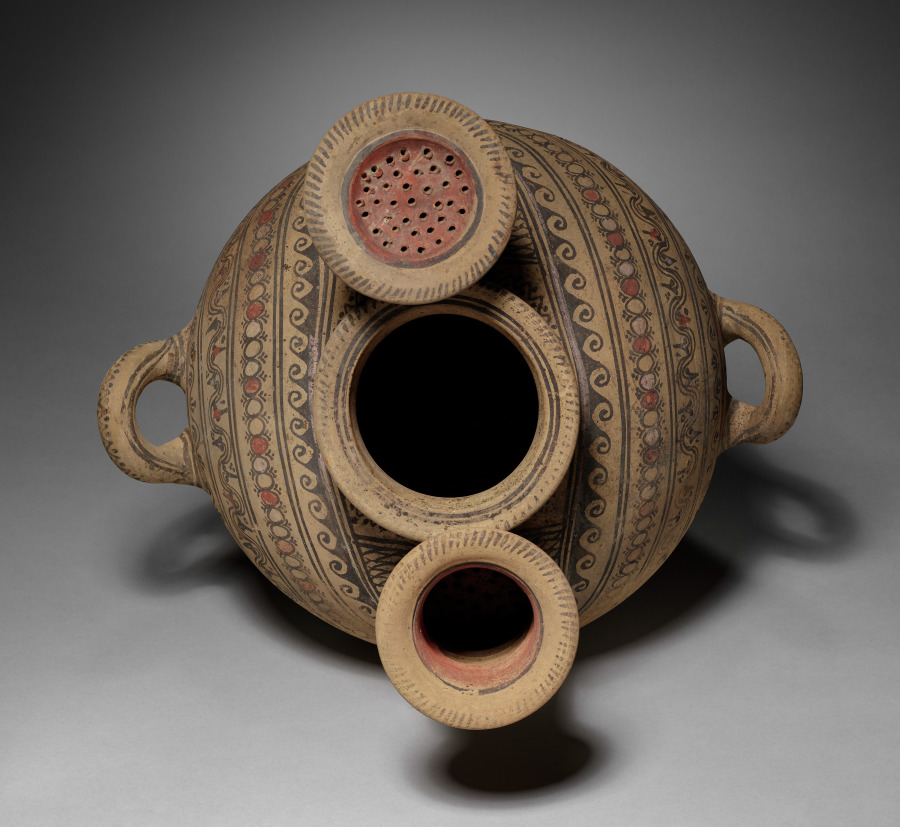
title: Two-Spouted Strainer Askos (Flask)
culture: South Italian, Daunian or Canosan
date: 300–200 BCE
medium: ceramic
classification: Ceramic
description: Although now referred to by the Greek term askos, because of its resemblance to the animal skins used to hold wine in ancient Greece, this ceramic shape developed in the South Italian region of Daunia (north of Apulia, on the Adriatic coast). This example is unusual for its three openings—one covered by a lid, the others spouted with built-in strainers. Its profusely painted decoration, mostly geometric and vegetal patterns applied in black with added red and white, is arranged in bands that follow the contours of the vessel.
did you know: Each spout has a built-in strainer—one near the top, the other near the bottom.